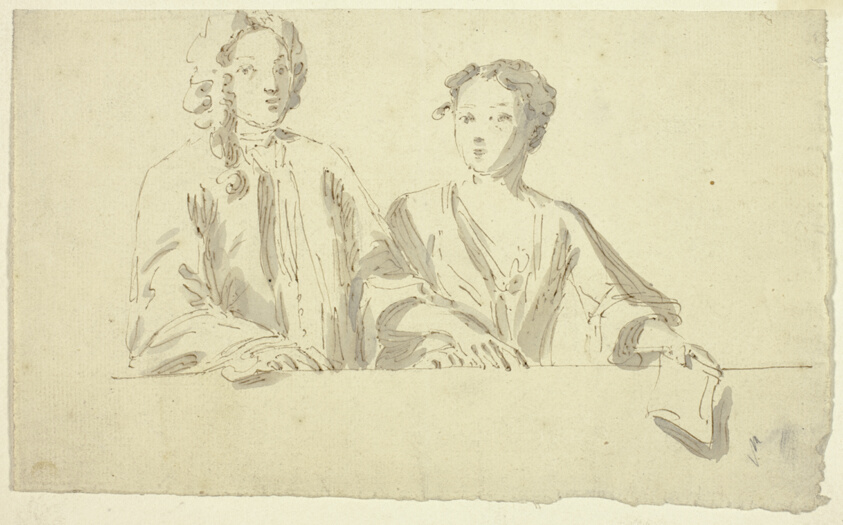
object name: Drawing and Watercolor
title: Bust Length Couple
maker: Unknown Artist; or possibly William Hogarth (English, 1697-1764)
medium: Pen and brown ink, with brush and gray wash, on cream laid paper, tipped on to ivory laid mount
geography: England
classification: pen and ink drawings; drawings (visual works); prints and drawing